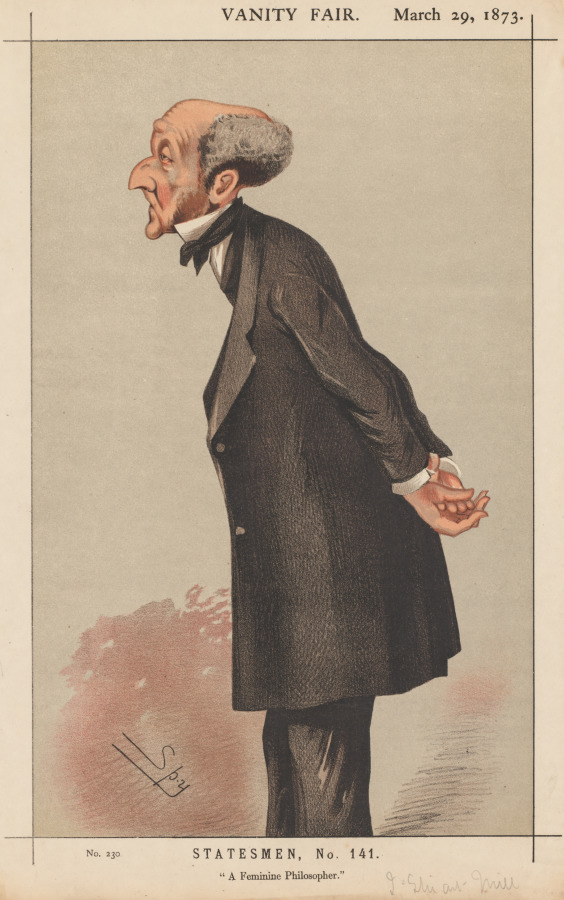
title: Vanity Fair: Statesman, No. 141 "A Feminine Philosopher"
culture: England, 19th century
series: published in Vanity Fair March 29, 1873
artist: Leslie Matthew (Spy) Ward (British, 1851–1922)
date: 1873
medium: color lithograph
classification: Print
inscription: Lower right, in graphite: J. Stuart Mill